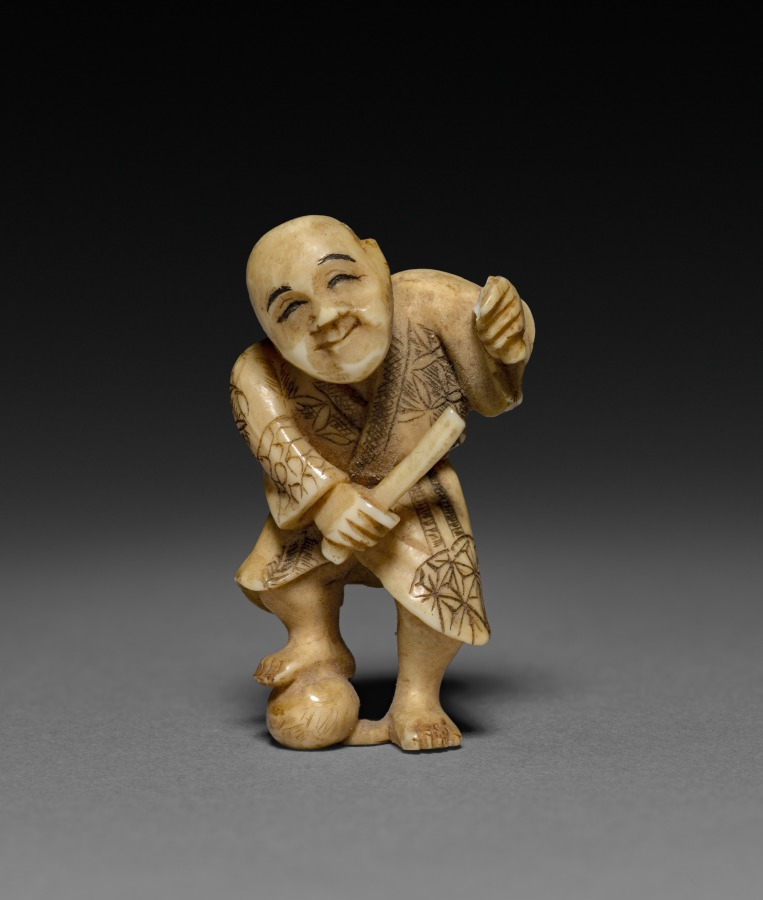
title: Netsuke of Man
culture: Japan, Meiji period (1868–1912)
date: 1900s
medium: ivory, pigment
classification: Ivory